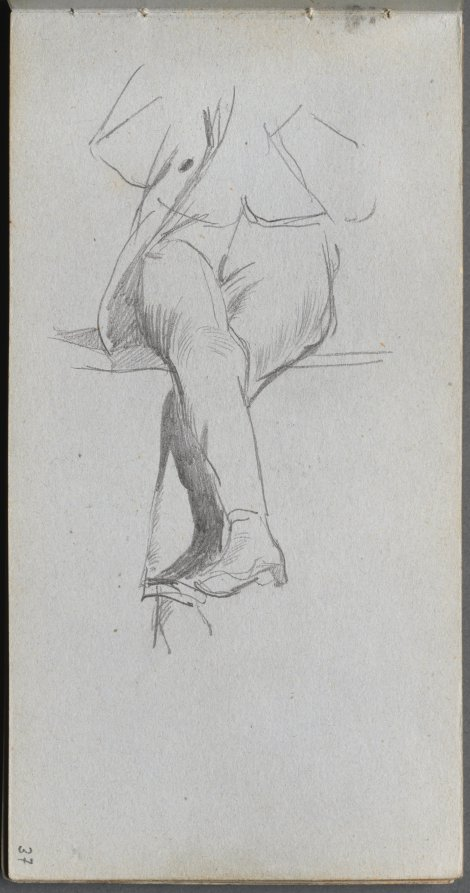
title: Sketchbook, page 37: Figure Study, crossed legs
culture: France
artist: Ernest Meissonier (French, 1815–1891)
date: c. 1860s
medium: graphite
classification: Bound Volume